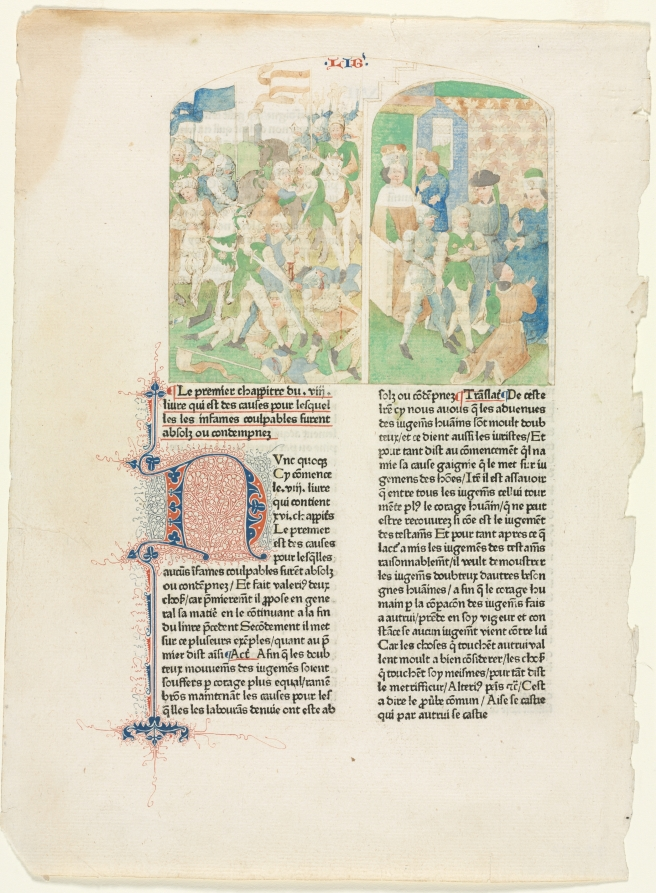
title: Opening Page of Book VIII of Valerius Maximus's Facta et dicta memorabilia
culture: Flanders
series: Valerius Maximus's Facta et dicta memorabilia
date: c. 1476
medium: pen and brown ink, watercolor, and gouache; framing lines in brown ink (around image), with letterpress text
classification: Drawing